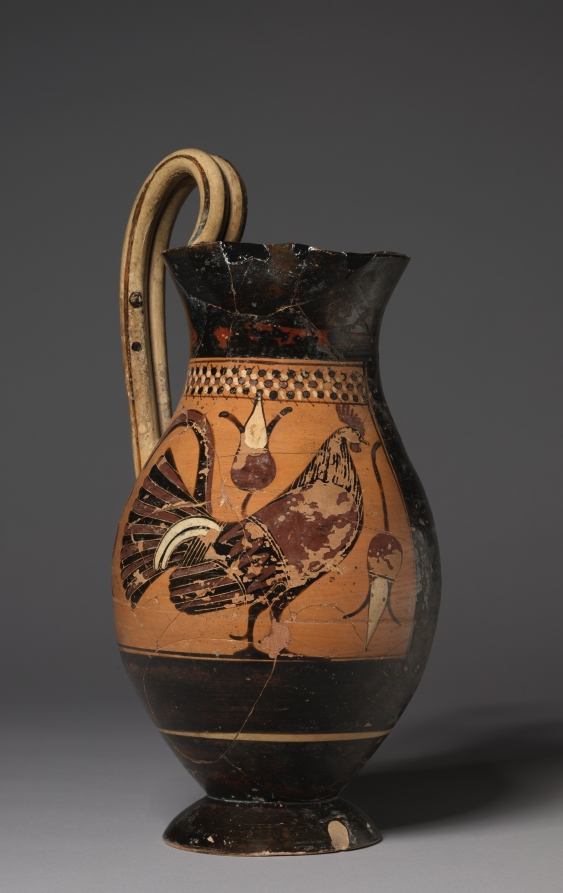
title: Black-Figure Olpe (Wine Jug): Rooster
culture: Greek, Middle/Late Corinthian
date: c. 575 BCE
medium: ceramic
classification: Ceramic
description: Although this wine jug, simply decorated with a rooster and two lotus blossoms, looks much like Athenian vases, it was made in Corinth. The paler buff color of the Corinthian clay can be seen on the handle and in some areas of loss, but the background of the decorated area has been covered with a red slip imitating the reddish, iron-rich Attic (or Athenian) clay. On the back of the vase, two reserved (red) crescent shapes may represent eyes, like those painted in much more detail on many drinking cups of this period.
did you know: Roosters appear frequently on vases—alone, in cock fights, and as love gifts.